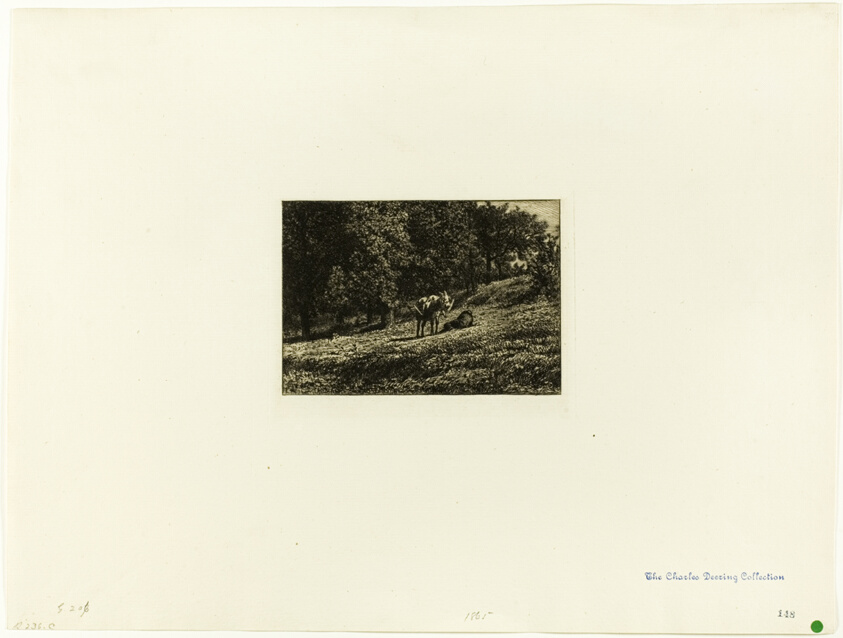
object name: Print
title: Orchard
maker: Charles Émile Jacque (French, 1813-1894)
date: c. 1864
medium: Etching and plate tone on ivory laid paper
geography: France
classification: etching; print; prints and drawing